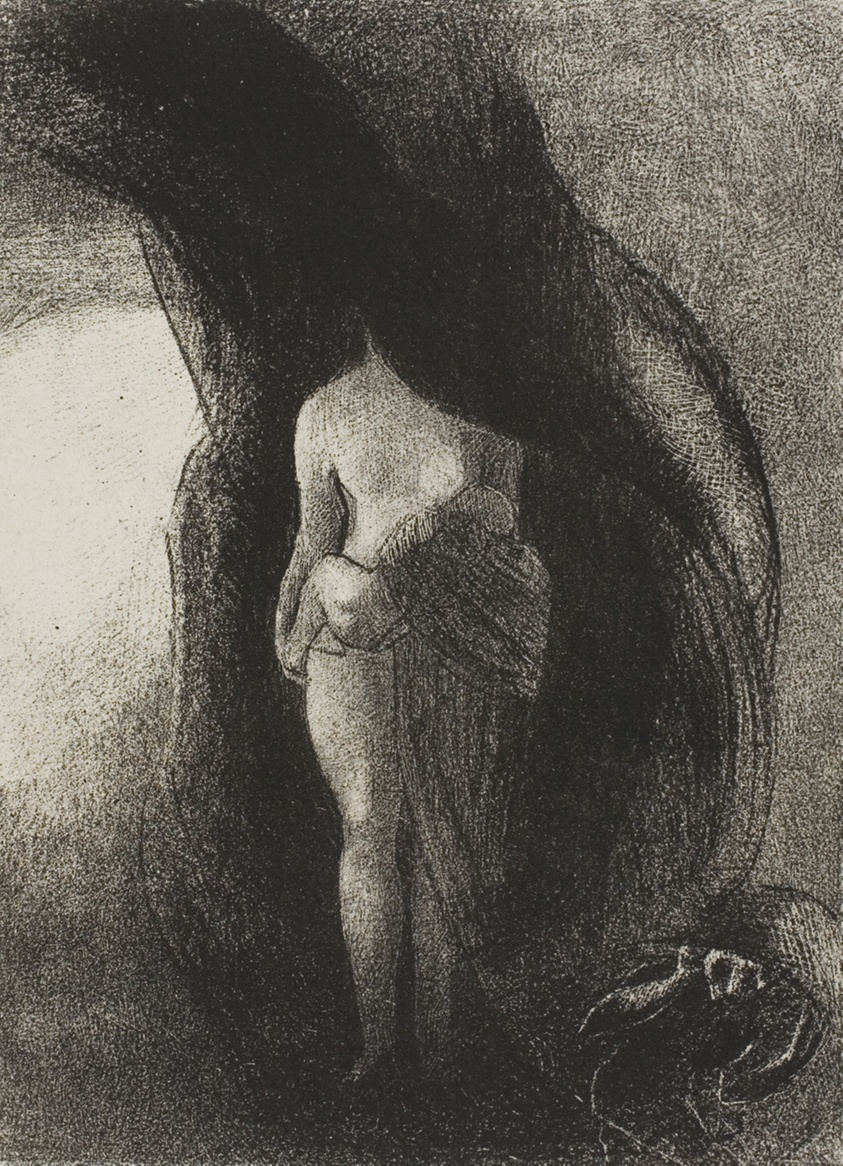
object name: Print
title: I am Still the Great Isis! Nobody Has Ever Yet Lifted My Veil! My Offspring is the Sun!, plate 16 of 24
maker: Odilon Redon (French, 1840-1916)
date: 1896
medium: Lithograph in black on cream China paper laid down on ivory wove paper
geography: France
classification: lithograph; print; prints and drawing; paper